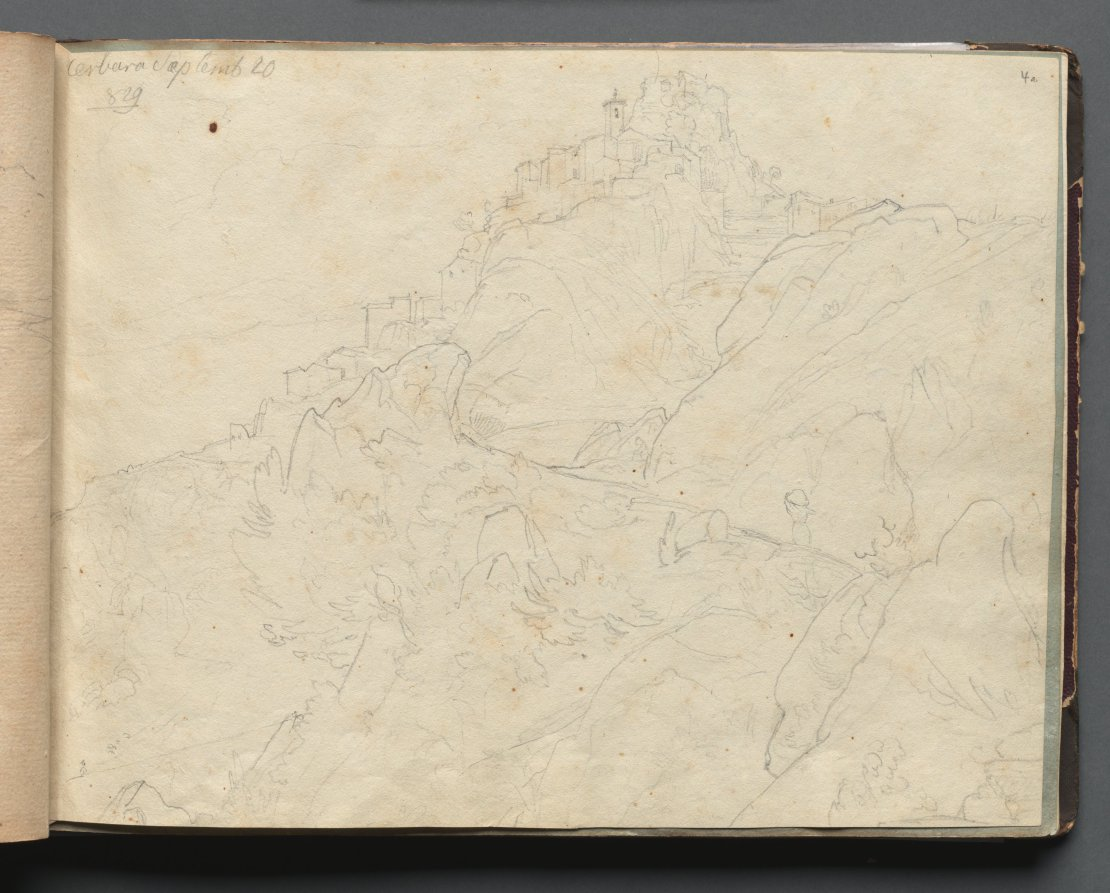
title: Album with Views of Rome and Surroundings, Landscape Studies, page 04a: "Cervera"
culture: Germany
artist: Franz Johann Heinrich Nadorp (German, 1794–1876)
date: c. 1830s-70s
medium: graphite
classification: Bound Volume